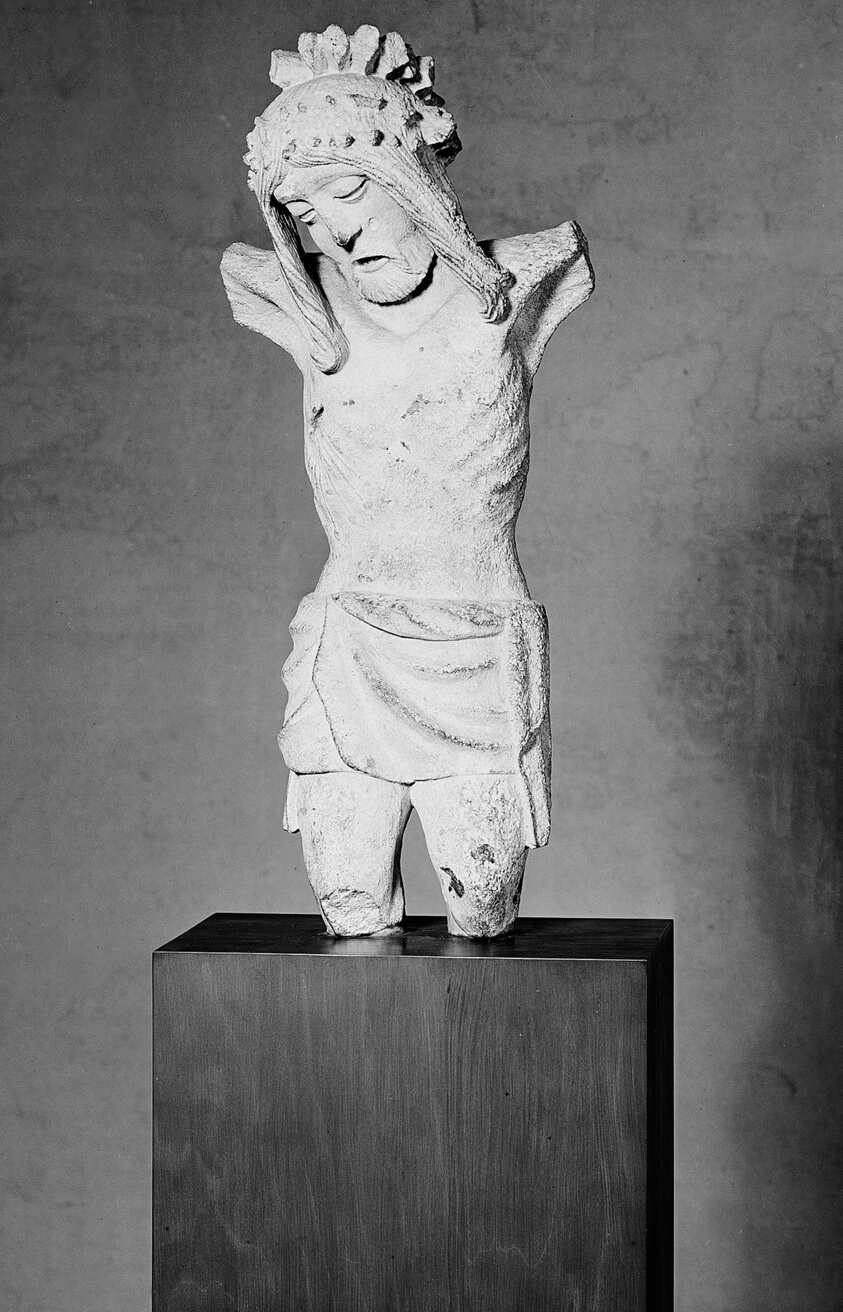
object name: Sculpture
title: Corpus of Christ Crucified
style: medieval, 15th century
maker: German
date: 1400-25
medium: Limestone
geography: Germany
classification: limestone; statuette; sculpture; sculpture/stone; stone; german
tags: crucifixions, Christian subjects, Christianity, figure, Jesus, man, religion, religious, religious figures